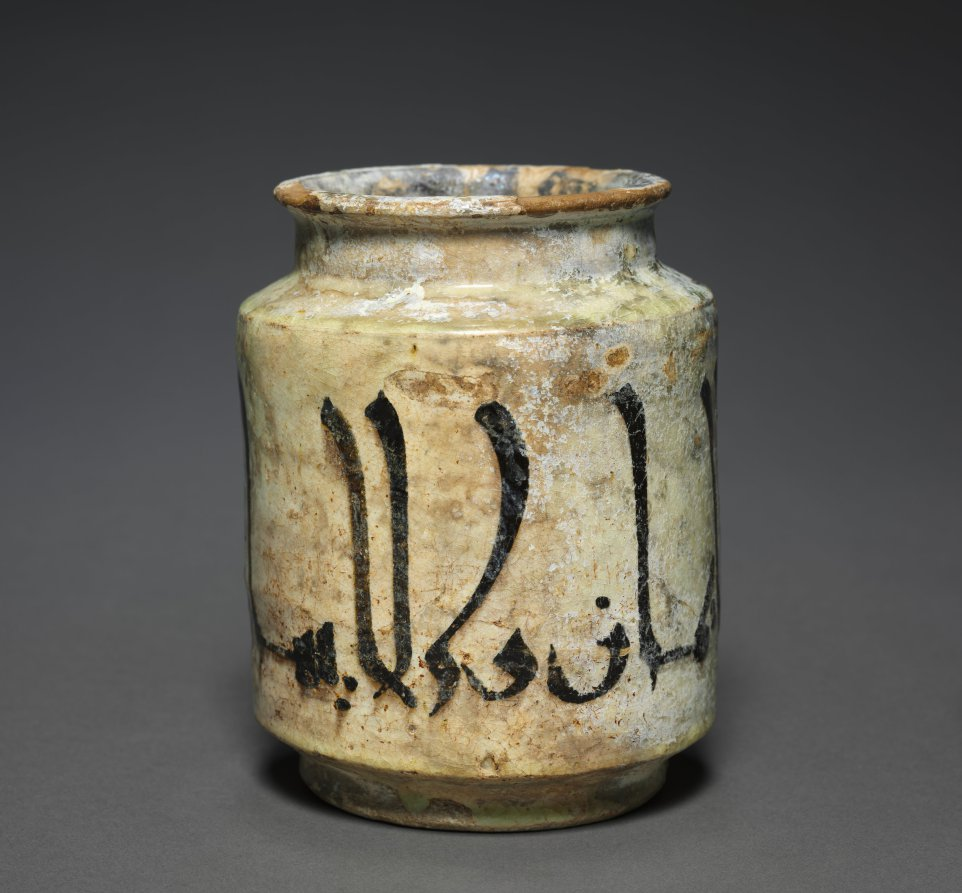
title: Albarello Jar with an Aphorism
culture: Central Asia, Samarkand, Samanid period (819–1005)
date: 900s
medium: Earthenware with underglaze decoration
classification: Ceramic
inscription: In Arabic: al-haya min al-iman w'al-iman min al-janna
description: The albarello was a jar designed to hold ointments and drugs for pharmacists. They were produced in the Middle East and Spain, as well as late medieval and Renaissance Italy. Albarellos are usually painted with floral, vegetal, or geometric designs. Arabic inscriptions are less common but here the elegant text reads: “Modesty [comes] from faith, and faith [comes] from Paradise,” attributed to the Prophet Muhammad.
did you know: The jar's Arabic inscription written in Eastern Kufic script.